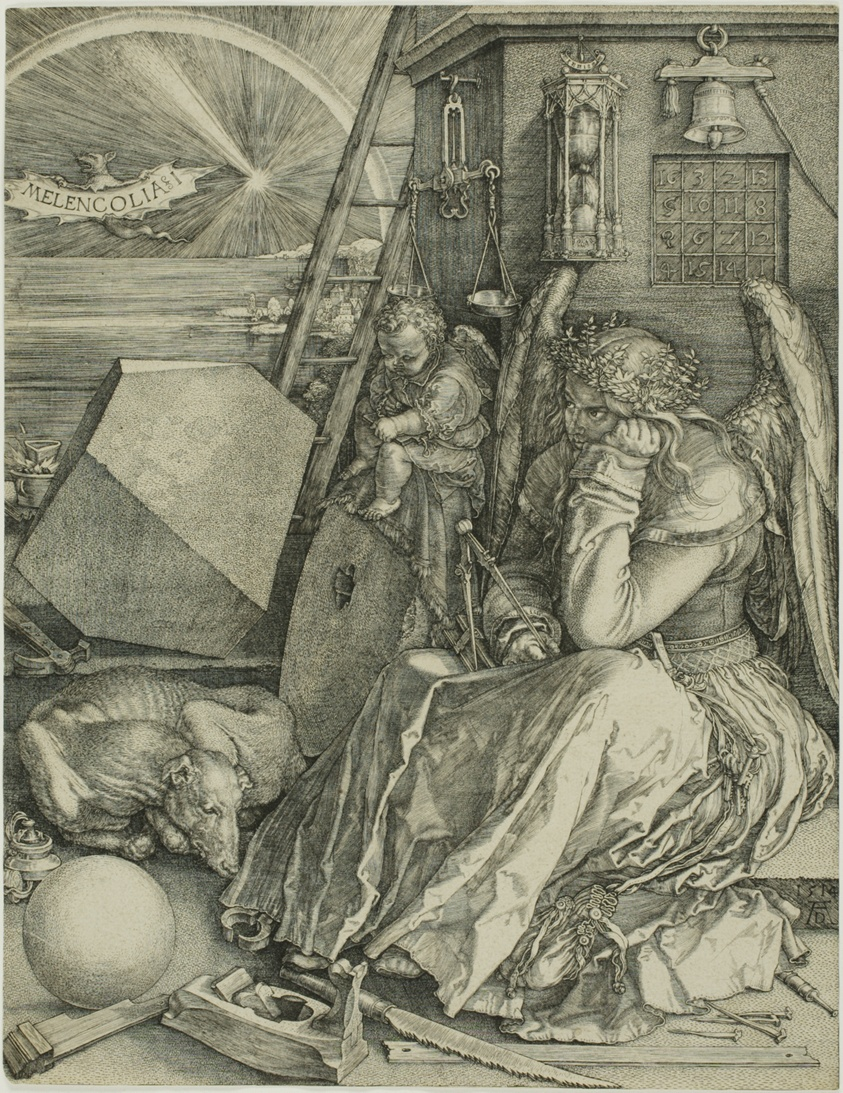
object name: Print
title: Melencolia I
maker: Albrecht Dürer (German, 1471-1528)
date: 1514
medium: Engraving in black on cream laid paper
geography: Germany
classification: engraving; print; prints and drawing; paper